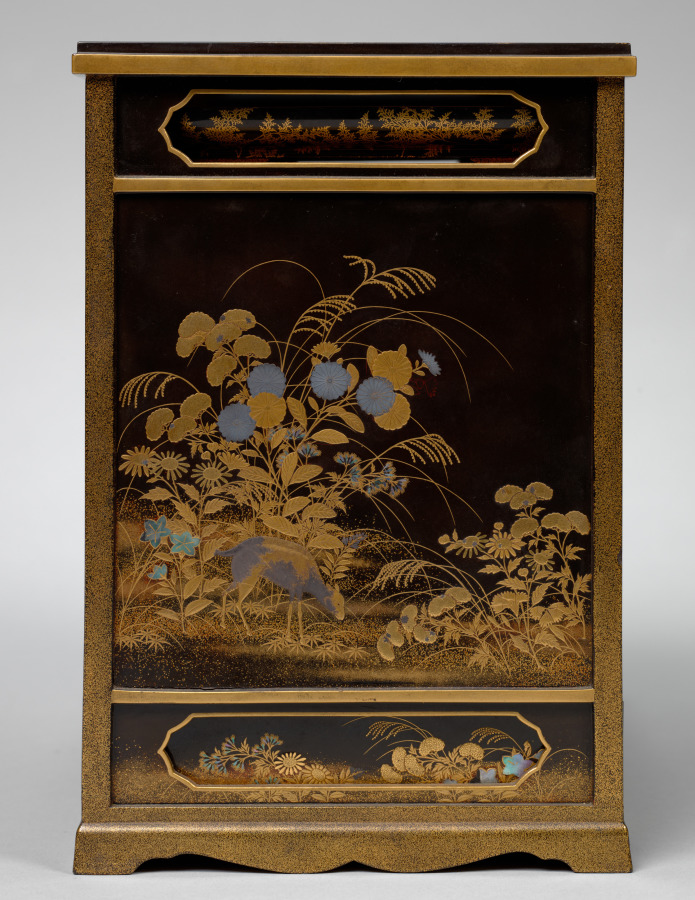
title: Ten-Round Incense Game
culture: Japan, Edo period (1615–1868)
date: 1700s–mid-1800s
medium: Lacquered wood with gold and silver sprinkled powder (maki-e) and mother-of-pearl inlay, metal fittings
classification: Lacquer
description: A popular pastime in the Edo period was a game in which a group of players passed around incense and guessed its name or scent. Small pieces of incense would be placed on thin mica plates and heated over hot ash, releasing their aroma for the players to smell. Players then cast their guesses with playing pieces. The game master kept score with the writing set. This game is handsomely decorated with images of deer in an autumn setting.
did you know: The blue and white porcelain containers in which the heated incense was passed feature designs of foreigners.